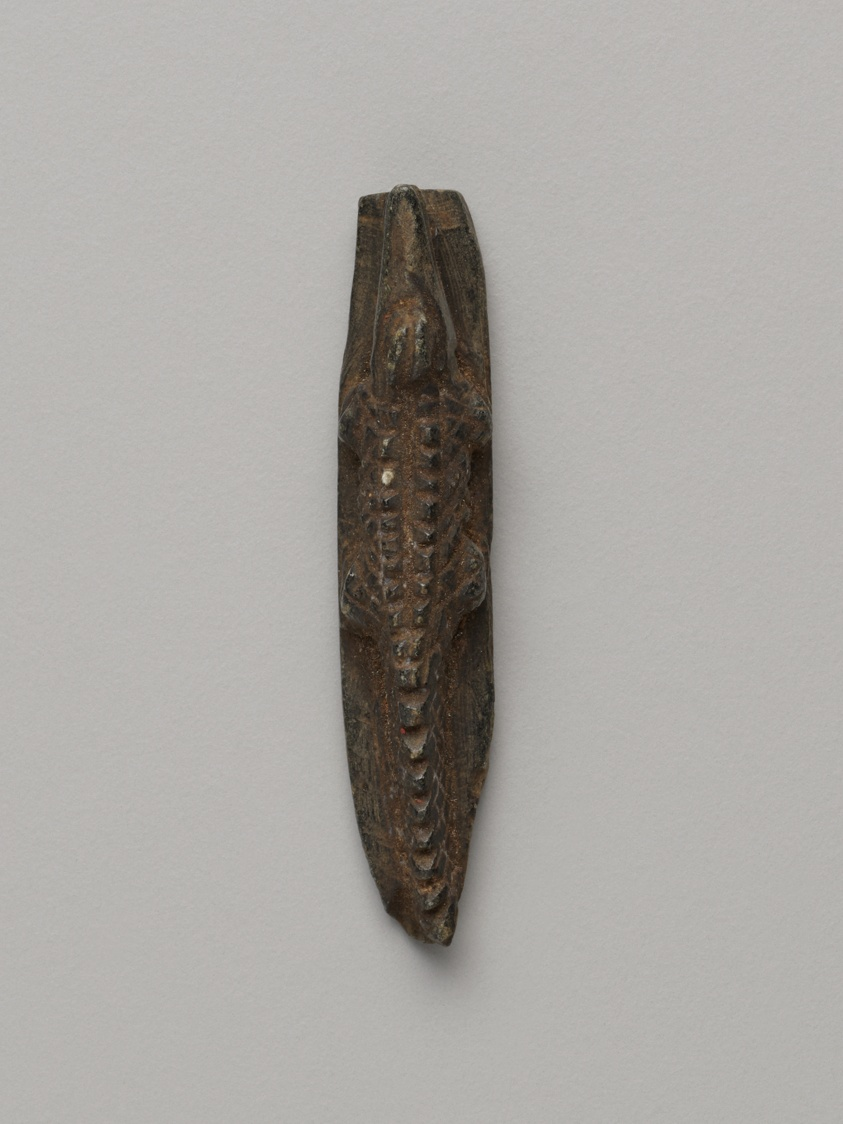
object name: Costume and Accessories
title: Amulet of a Crocodile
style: egyptian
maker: Egyptian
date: New Kingdom–Third Intermediate Period (about 1500–664 BCE)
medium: Steatite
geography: Egypt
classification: amulet; jewelry; stone; ancient art; costume